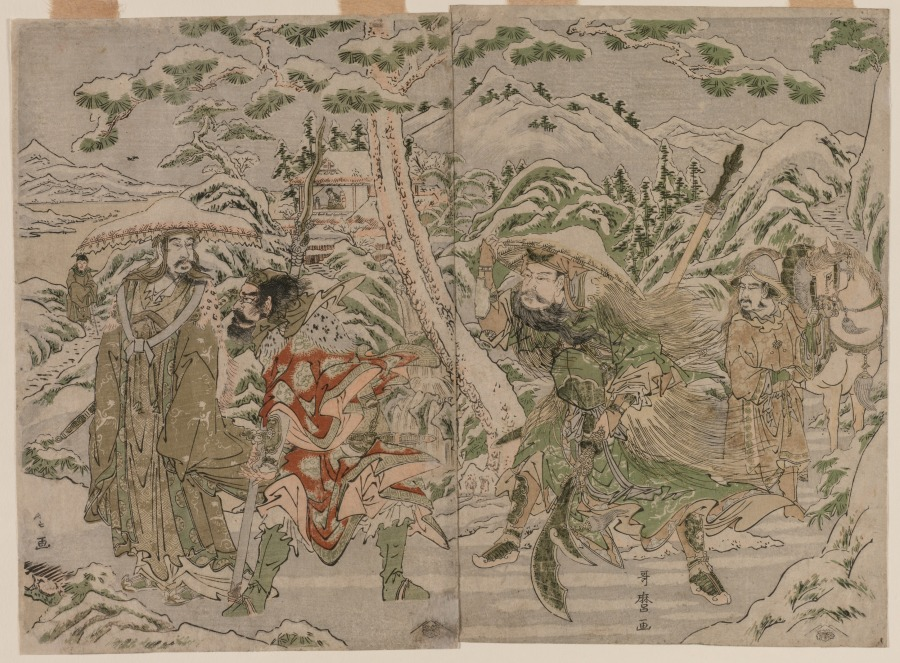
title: Winter Scene from the Romance of the Three Kingdoms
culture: Japan, Edo period (1615–1868)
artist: Kitagawa Utamaro (Japanese, c. 1754–1806)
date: c. 1790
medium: color woodblock print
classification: Print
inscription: Signature: Utamaro ga Publisher: Tsutaya Juzaburo (emblem)